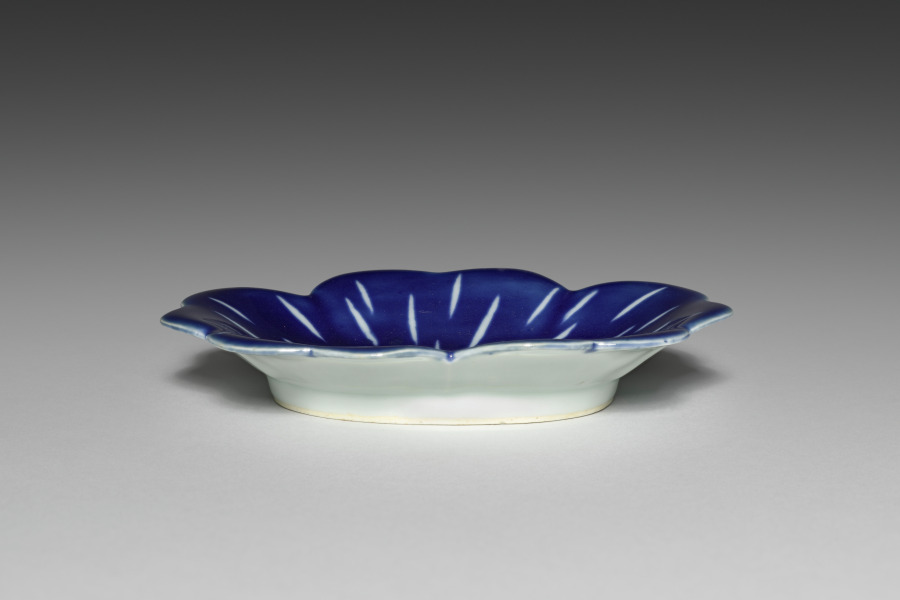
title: Small Dish (Kozara) with Fireworks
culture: Japan, Edo period (1615–1868)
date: mid-1600s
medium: Porcelain with molding and underglaze blue (Hizen ware, Nabeshima type)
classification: Ceramic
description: This dish evokes the popular summer pastime of fireworks displays.